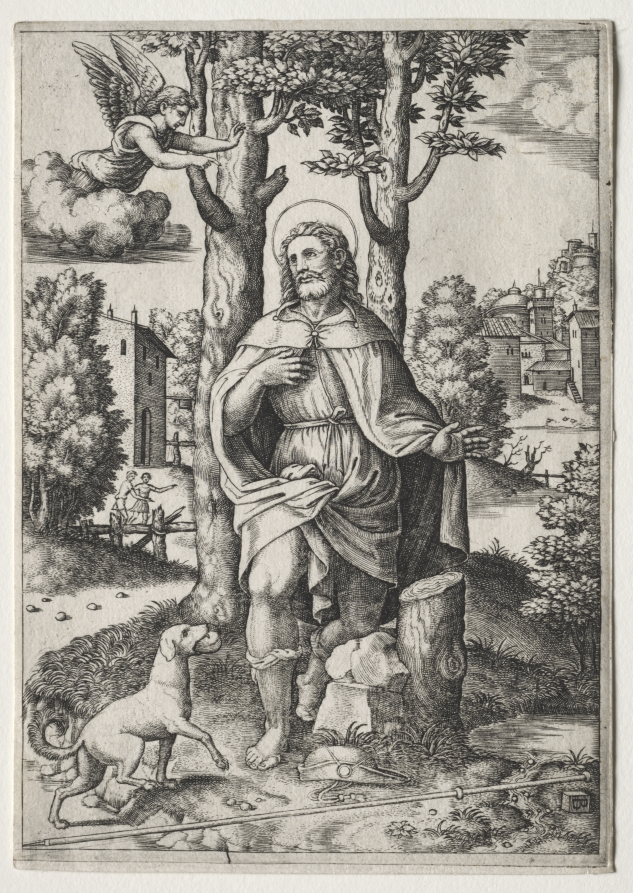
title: Saint Roch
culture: Italy, 16th century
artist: Master of the Die (Italian, active about 1530–60)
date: 1530–60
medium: engraving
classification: Print